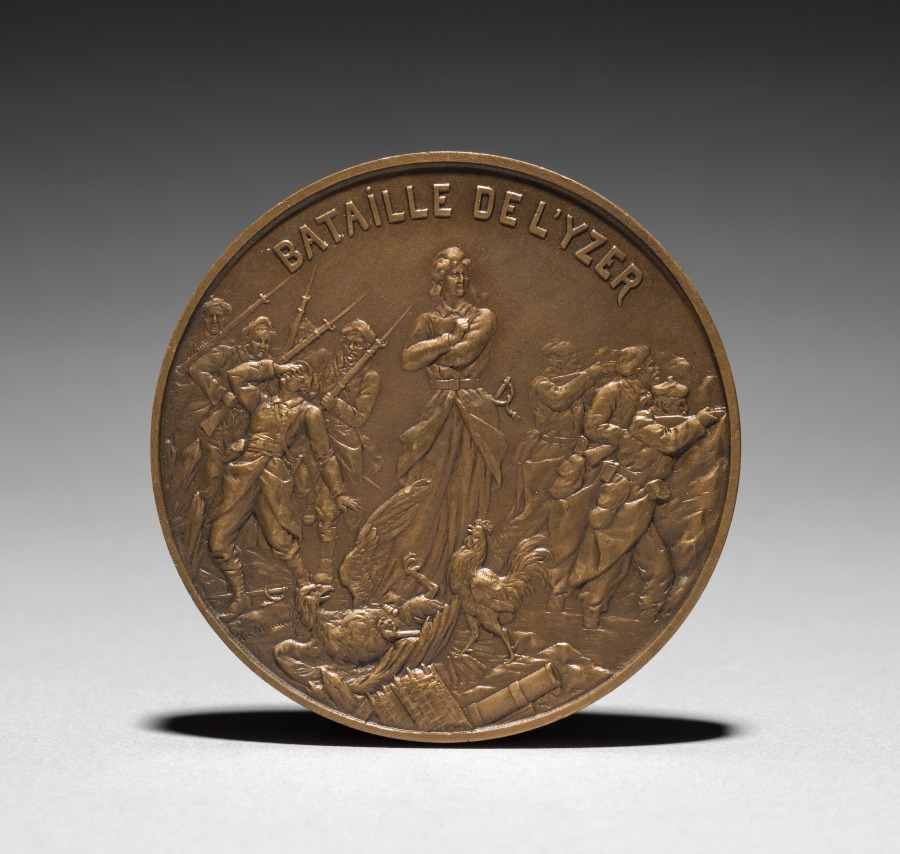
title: Medallion (obverse)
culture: France, 19th-20th century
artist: Henri Emile Allouard (French, 1844–1929)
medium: bronze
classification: Metalwork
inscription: "Bataille de l'Yzer."